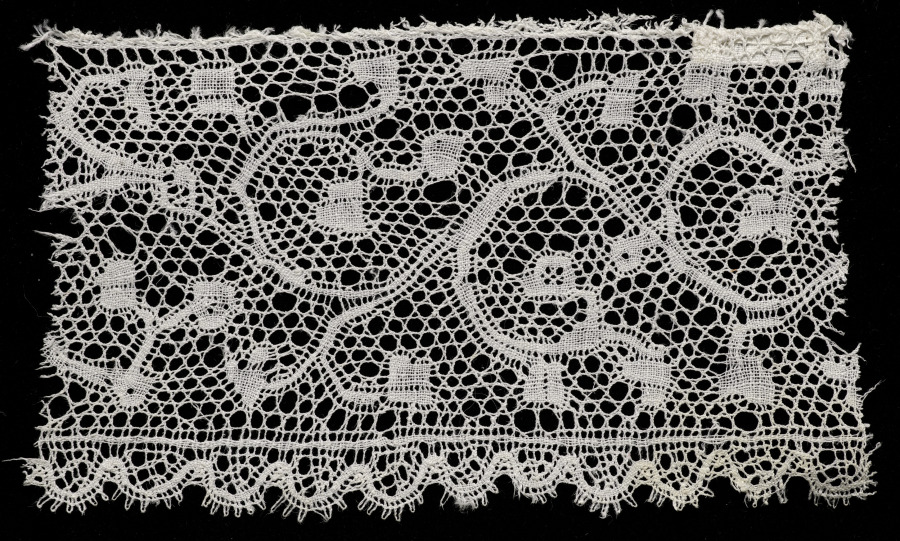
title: Lace Edging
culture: Spain, Huelva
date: 1600s–1700s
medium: Bobbin lace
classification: Lace